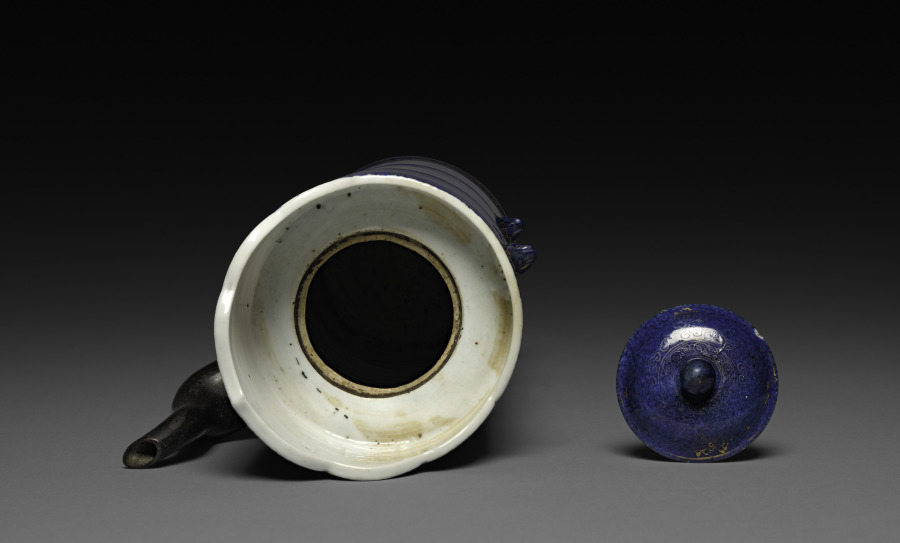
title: Cylindrical Ewer with Dragons Pursuing Flaming Jewel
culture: China, Jiangxi province, Jingdezhen kilns, Qing dynasty (1644-1911), Kangxi reign (1662-1722)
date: 1662–1722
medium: porcelain with powder blue glaze painted with gold decoration and supplied with metal fittings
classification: Ceramic